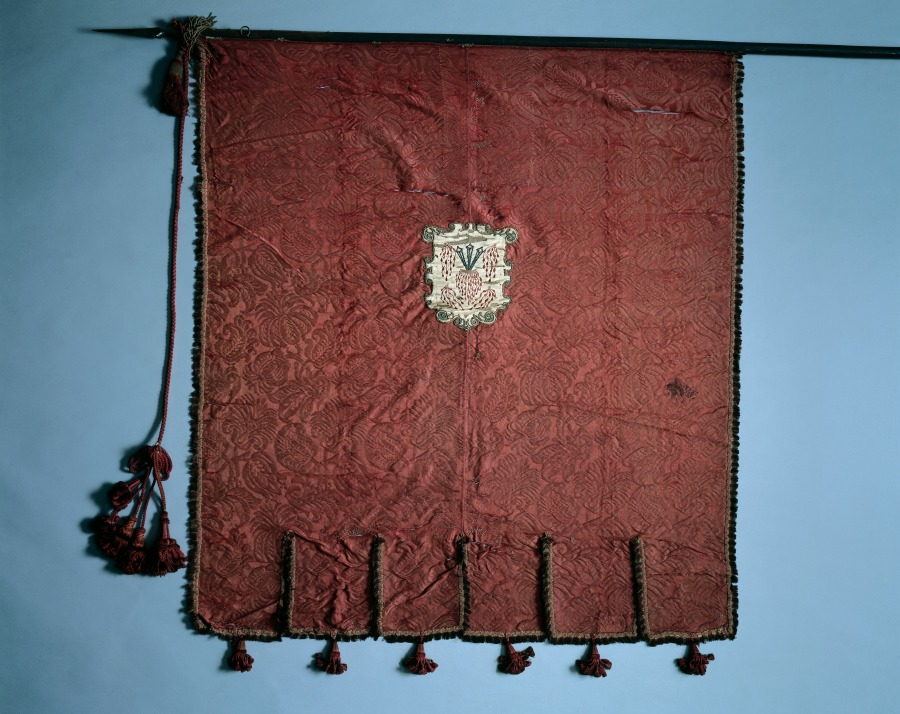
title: Banner with Medallions of Christ's Passion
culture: Spain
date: 1700s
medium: crimson silk brocade; satin; scalloped border with fringe and tassels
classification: Textile